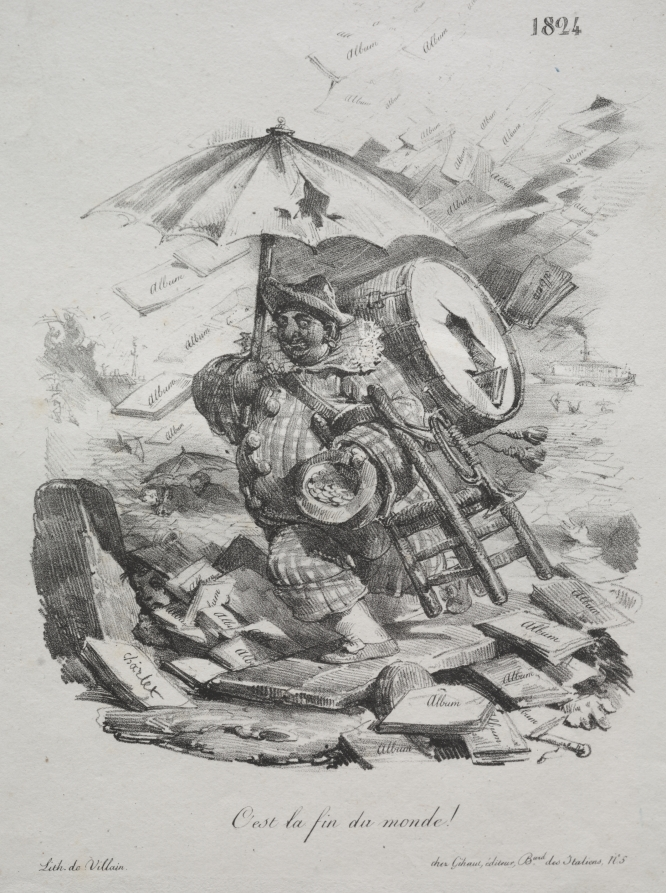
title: Lithographic Sketches: It is the End of the World! (frontispiece)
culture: France, 19th century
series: Croquis lithographiques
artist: Nicolas Toussaint Charlet (French, 1792–1845)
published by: Gihaut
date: 1824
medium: lithograph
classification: Print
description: The museum's extensive collection of early lithography documents the development of the technique in Europe. Invented by a German, Alois Senefelder (1771-1834), in 1798 for commercial purposes, lithography was quickly adopted by artists. Lithography did not begin in France until 1816, however, when two workshops were established in Paris. By 1824 so many lithographs were being produced that a deluge of lithographic albums could end the world!